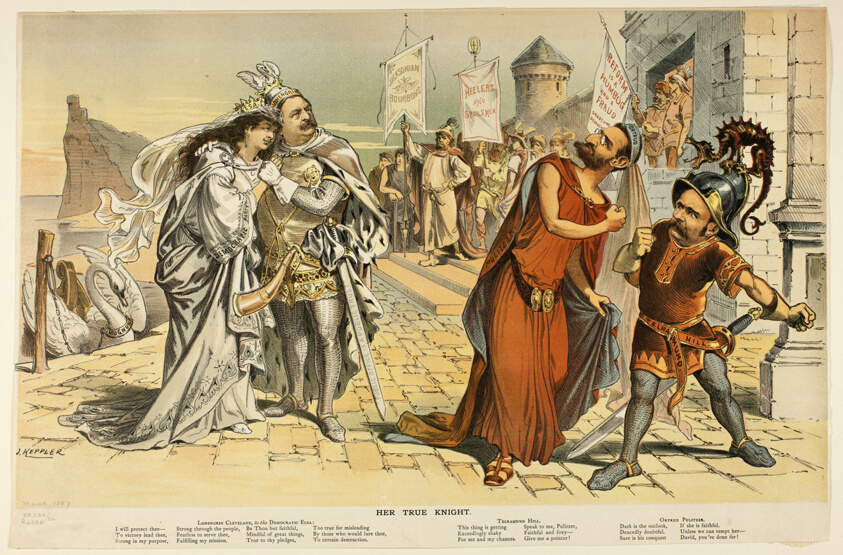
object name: Print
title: Her True Knight, from Puck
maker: Joseph Keppler (American, 1838-1894)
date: 1887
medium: Color lithograph on newsprint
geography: United States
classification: lithograph; print; prints and drawing